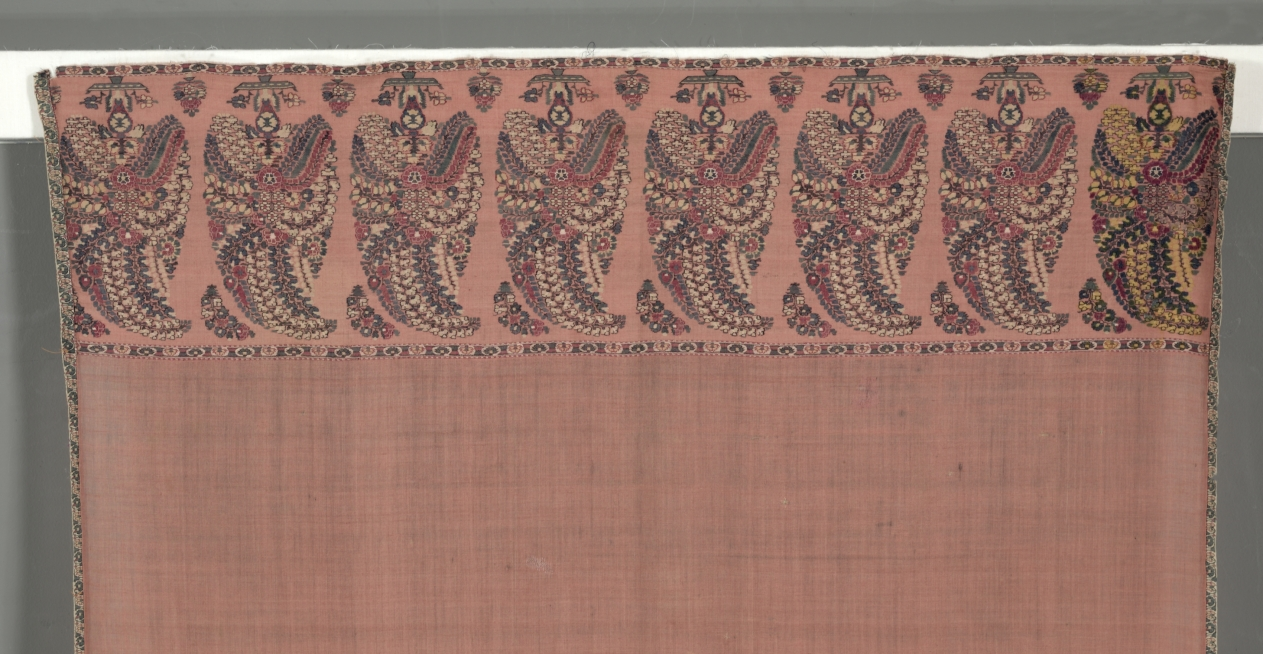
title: Apricot Long Shawl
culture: India, Kashmir, Afghan period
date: 1785–1800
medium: 2/2 twill tapestry weave, double interlocked; wool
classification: Textile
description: Artistic styles evolved with increasingly elaborate mosaic-like decoration during the 1800s to meet an insatiable European demand. Early shawls had plain fields with isolated plants in the end panels, which led to decorated side borders and vases of blossoming stems. Such flora was replaced by colorful, dense blossoms forming cone-shaped botehs, or paisleys, on trays. To this was added a gallery of small botehs and angular floral vines around a rich blue field with single botehs in the corners. Lightweight, supple, warm, and colorful, Kashmir shawls had no equal. Fine, soft goat-hair wool was woven in a 2/2 twill tapestry weave—the equivalent of painting with colored weft threads. Imitations woven in Paisley, Scotland, prompted the popular term paisley.